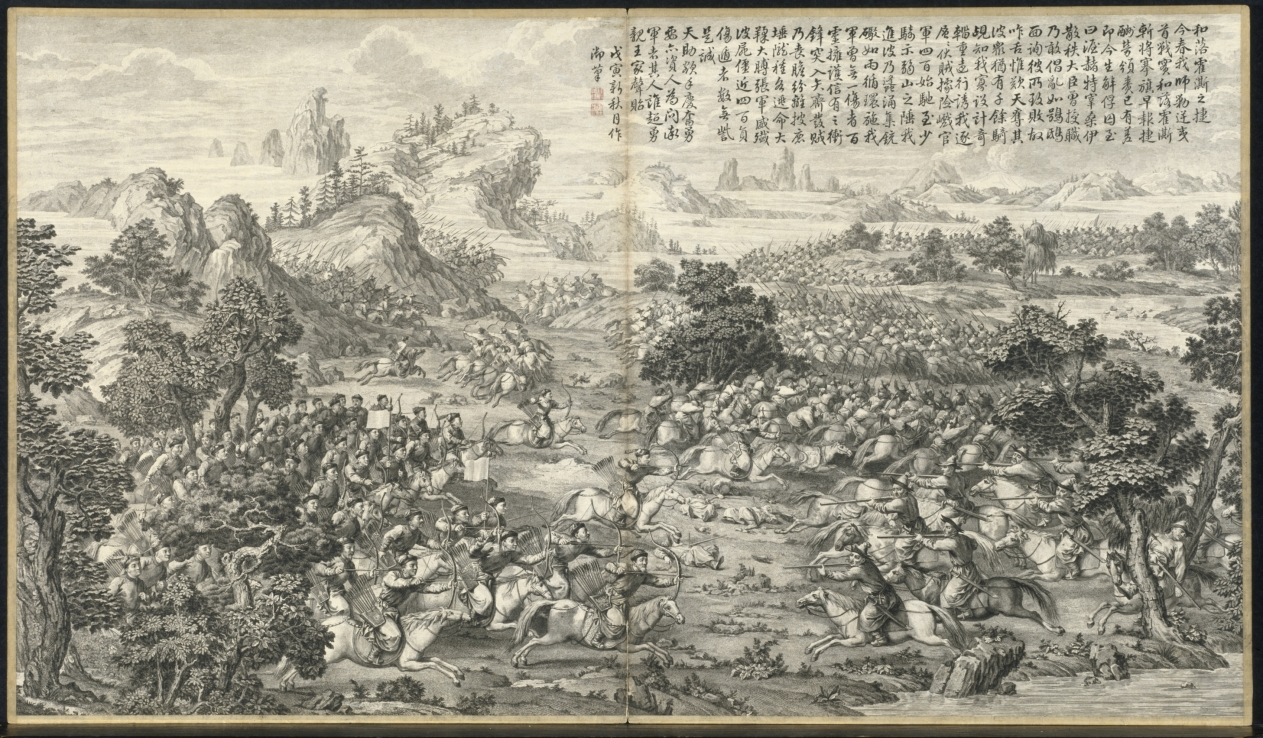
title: Victory at Heluo Heshi: from Battle Scenes of the Quelling of Rebellions in the Western Regions, with Imperial Poems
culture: China, Qing dynasty (1644–1911), Qianlong reign (1736–95)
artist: Jean Denis Attiret (French, 1702–1768)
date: c. 1765–74; poem dated 1758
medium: etching, mounted in album form, 16 leaves plus two additional leaves of inscriptions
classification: Print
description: This set of etchings was commissioned by Emperor Qianlong to record in pictorial terms the courage of his generals and soldiers in quelling the rebellions in the Western Regions. Qianlong added his own poem to each of the etchings, indicating his appreciation and pride in this demonstration of military might. "Western Regions" refers to the present-day Xingjiang province, often described in Western writing as "Central Asia."